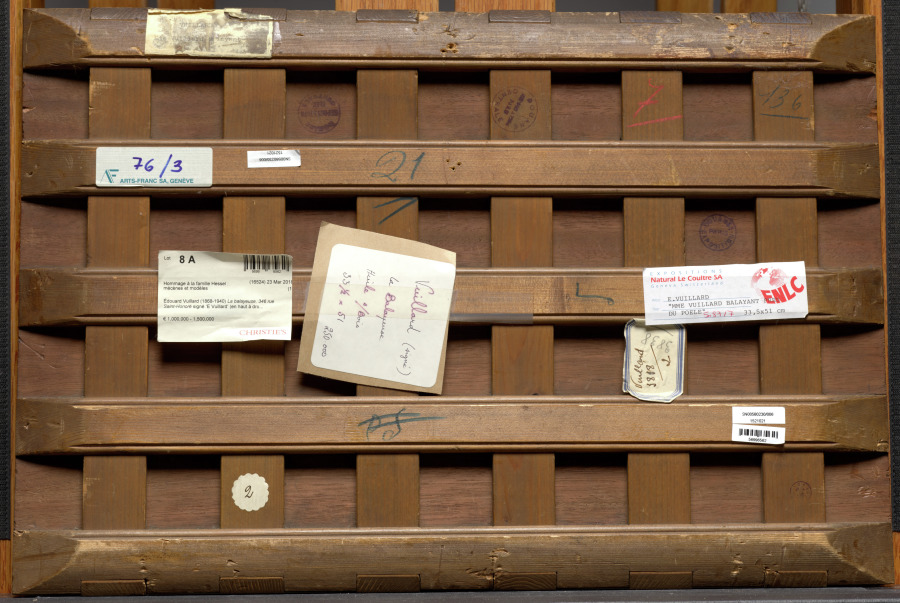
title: Orchard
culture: France, 19th century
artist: Édouard Vuillard (French, 1868–1940)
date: 1897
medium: oil on board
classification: Painting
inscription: signed lower center: E Vuillard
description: The organic strokes that comprise Vuillard’s trees contrast with the linear divisions of agricultural land. The imagery is reminiscent of a passage written by the artist’s muse, Misia Natanson: “Solemn and dreamy, Vuillard led me along the river, past high silver birch trees. . . . He slowly moved through the yellowed grass. . . . Our silhouettes were just shadows against a pale sky.”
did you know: Fellow artist Maurice Denis noted in his journal that Vuillard paid little attention to color theory. In this painting, Vuillard used several colors that are next to each other on the color wheel such as orange, yellow, and green rather than pairing complementary colors.